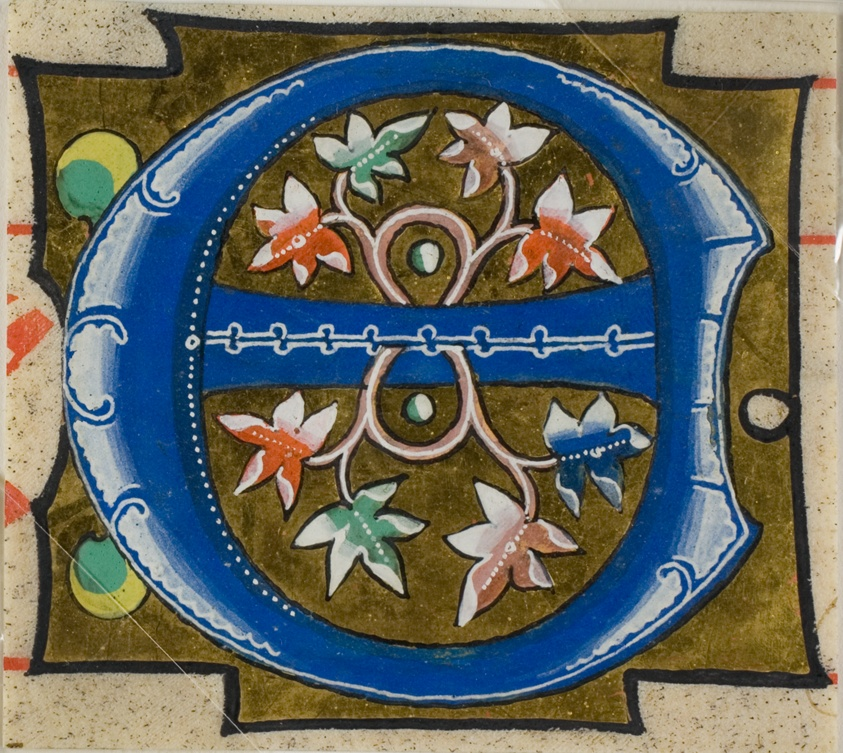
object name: Drawing and Watercolor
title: Decorated Initial "E" with Flowers from a Choir Book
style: medieval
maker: European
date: 14th century or modern, c. 1920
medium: Manuscript cutting in tempera and gold leaf on vellum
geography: Europe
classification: tempera; manuscript; drawings (visual works); prints and drawing